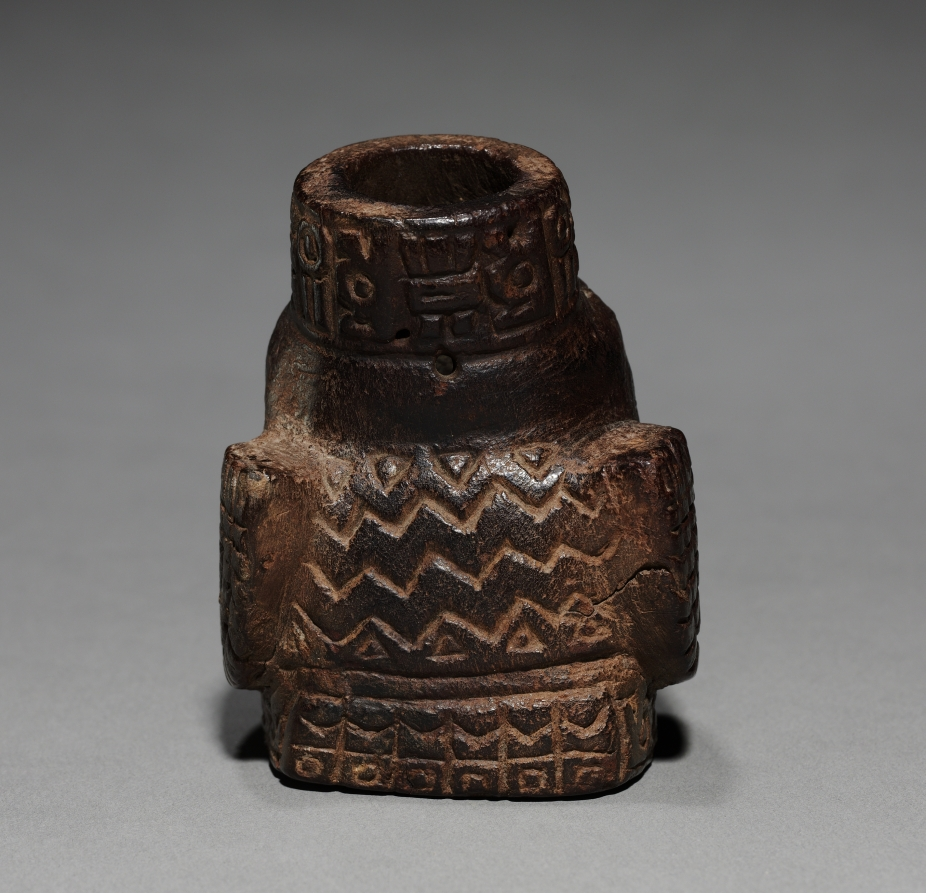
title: Bird-Shaped Container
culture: Peru, Wari style (500-900)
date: 500–900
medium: wood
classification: Sculpture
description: Peruvian Indians today regard coca leaf as a sacred substance that creates communion with deities. The leaves are chewed with powdered lime that in antiquity was stored in containers and scooped with spatulas like those seen here. Aside from its ritual meaning, coca has practical benefits: it is vitamin-rich and, like coffee, induces clear-headedness. The lizard spatula is Nasca; the other two are Wari.